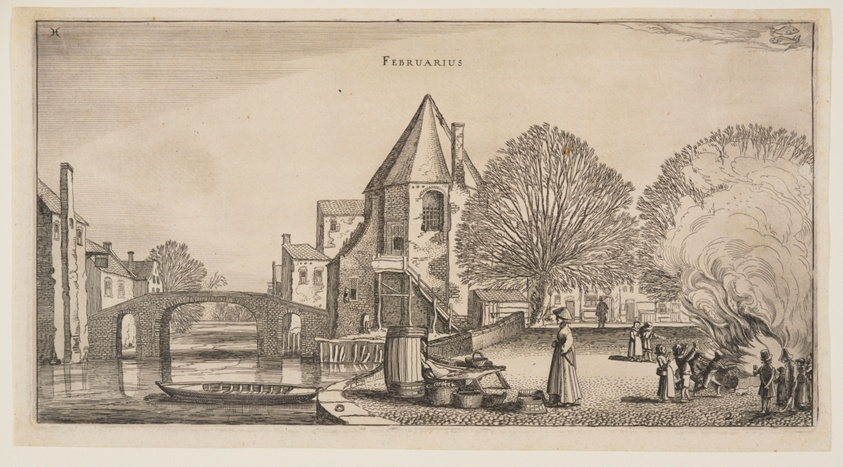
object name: Print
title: February, from The Twelve Months of the Year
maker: Jan van de Velde II (Dutch, c. 1593–1641); after Willem Buytewech (Dutch, c. 1591–1624)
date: 1616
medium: Etching on ivory laid paper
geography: Netherlands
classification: etching; paper; print; prints and drawing